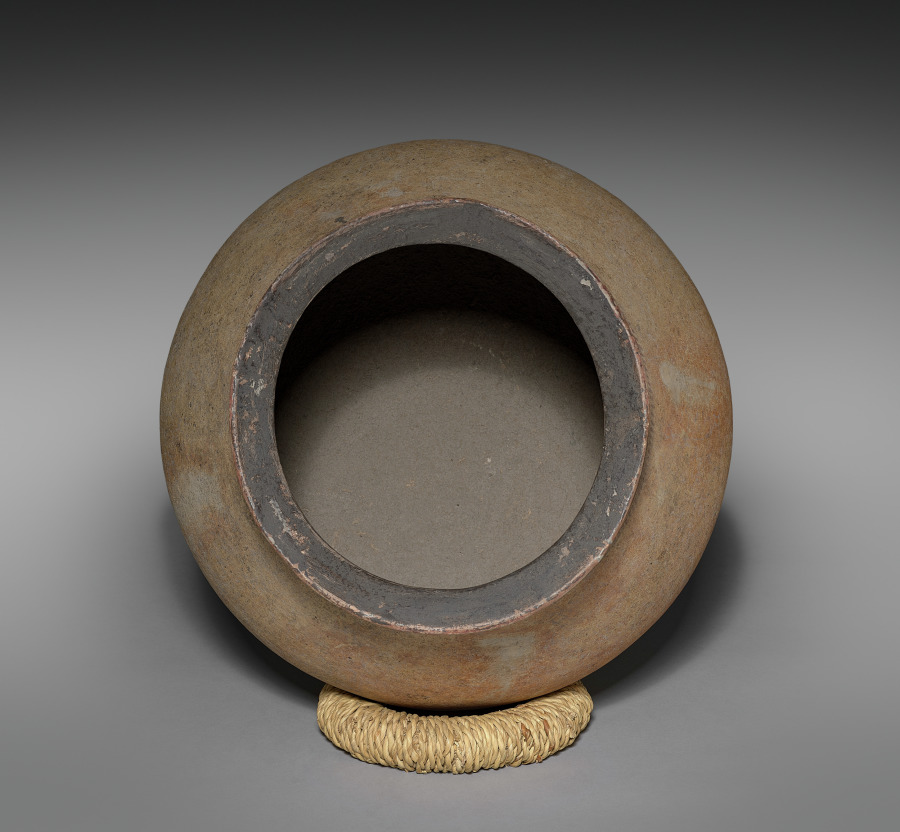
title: Jar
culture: Thailand, Ban Chiang, Neolithic Period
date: 3000s BCE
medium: reddish earthenware with painted decoration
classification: Ceramic